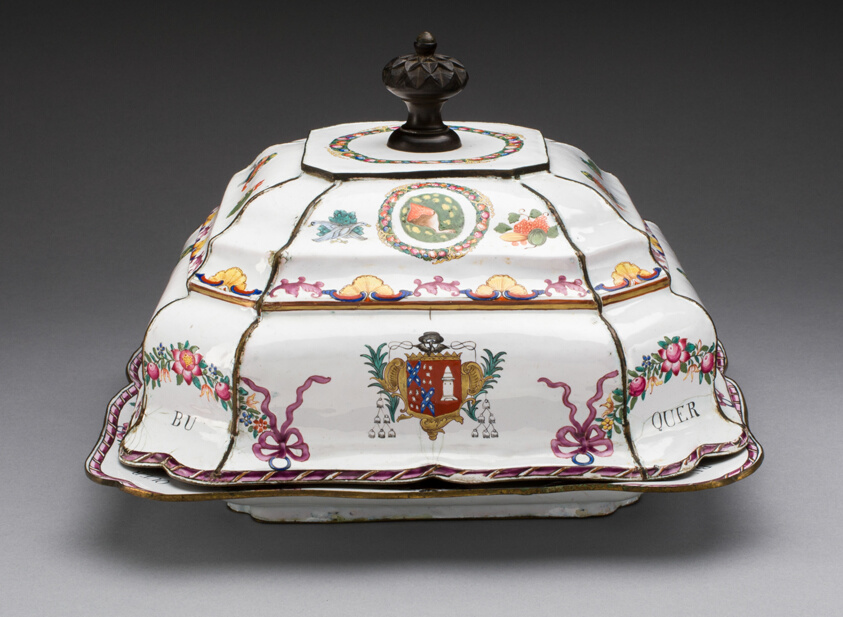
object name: Metalwork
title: Covered Dish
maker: China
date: c. 1765, Qing dynasty (1644–1911), Qianlong reign mark and period (1736–95)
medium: Enameled copper decorated with canton enamels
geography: Junyao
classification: dish (vessel); european decorative arts; ceramics; enamel; metalwork